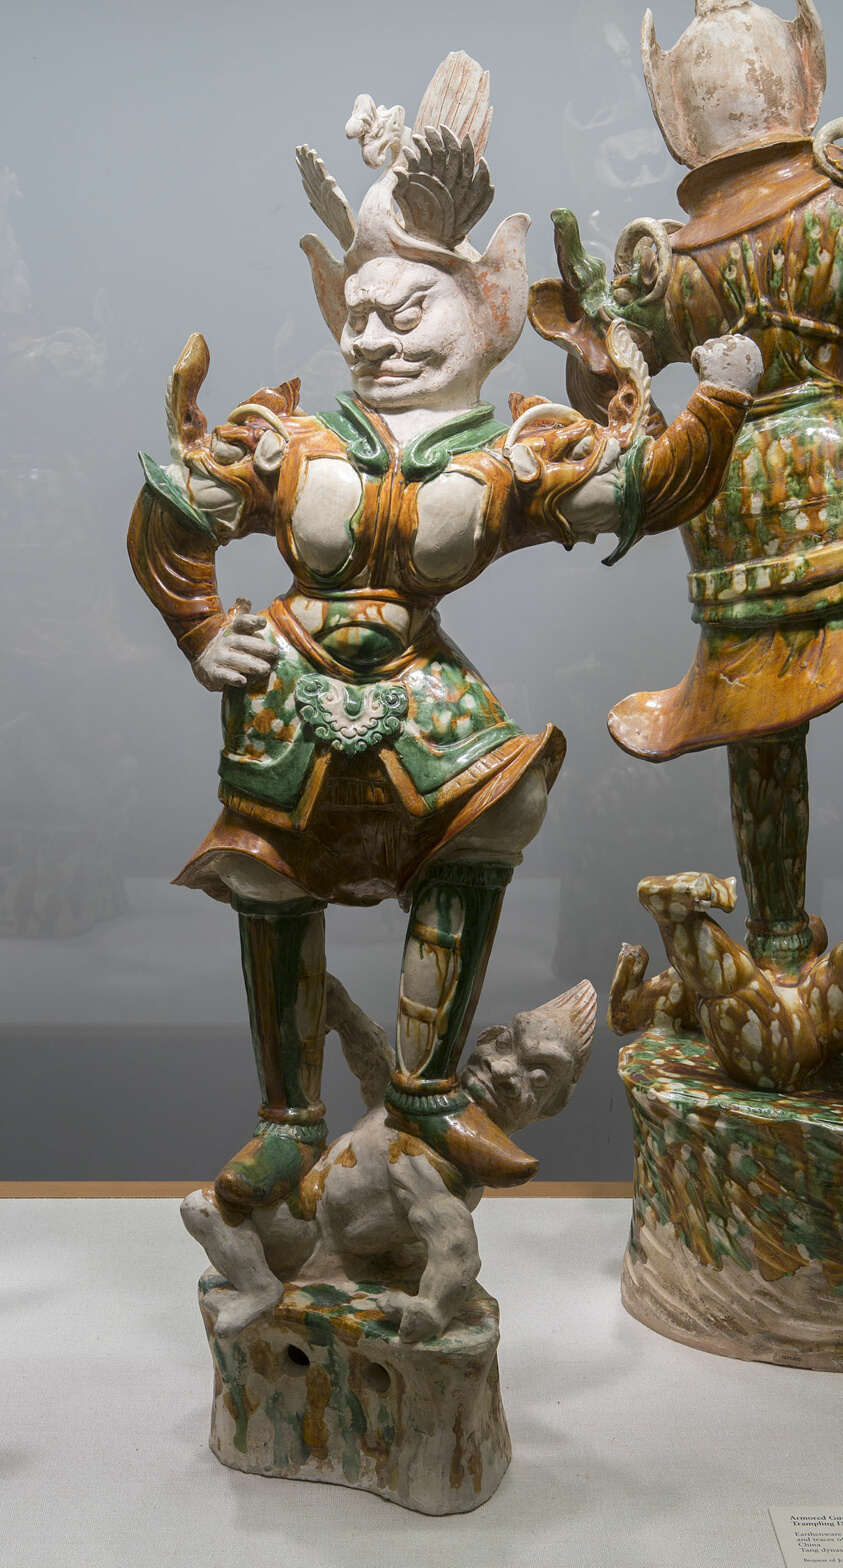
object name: Sculpture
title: Armored Guardian King (Tianwang) Trampling Demon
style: Chinese (culture or style)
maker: China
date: Tang dynasty (618–907), first half of 8th century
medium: Earthenware with three-color (sancai) lead glazes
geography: China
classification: earthenware; ceramics; asian art; sculpture